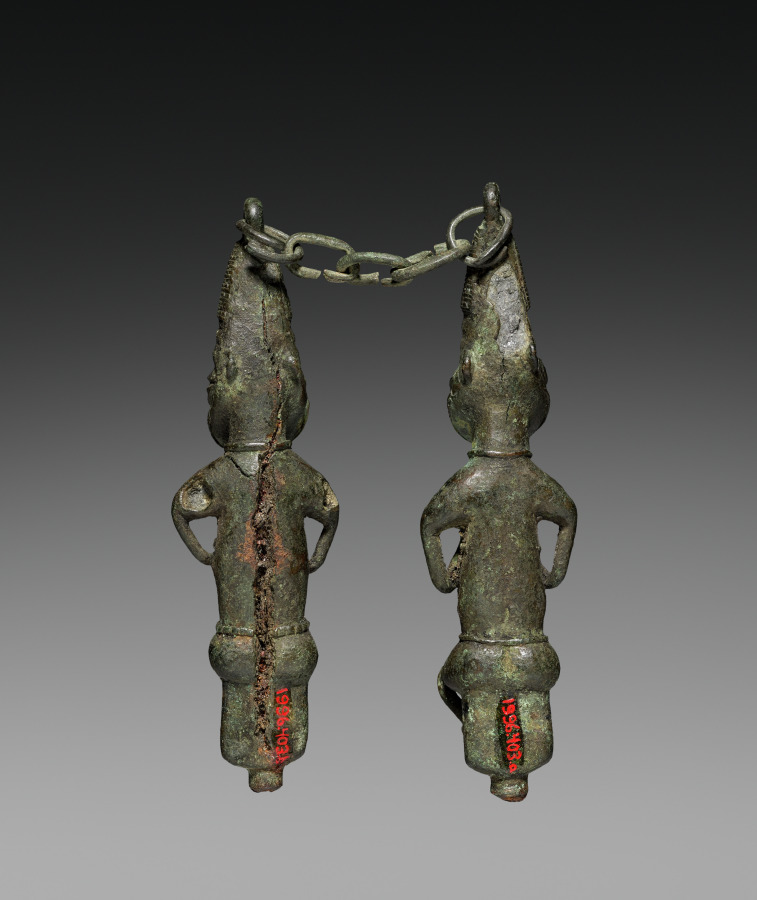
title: Pair of Ritual Staffs (ẹdan Ògbóni)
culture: Africa, West Africa, Nigeria, Yorùbá-style maker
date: possibly 1800s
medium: Copper alloy and iron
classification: Sculpture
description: The chain connecting these two figures allows them to be worn in public by a member of the Ògbóni or Òṣùgbó association as authority emblems. The male on the right gives the association’s typical salute by clasping his left fist on the right one, while the female on the left holds her breasts as a sign of welcome and generosity. The use of copper alloy and iron expresses Ògbóni/Òṣùgbó's concerns with longevity and durability.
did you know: Imagine how this would look when its owner wore it; the chain would go around the back of the neck and the figures would rest on their chest.